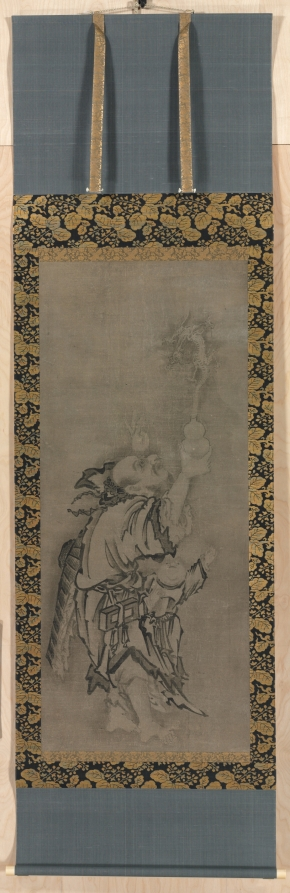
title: Hotei with Daoist Immortals: Immortal with Gourd and Dragon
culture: Japan, Edo period (1615–1868)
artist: Kyūseki Tomonobu (Japanese, 1653–1721)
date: late 1600s-early 1700s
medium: triptych of hanging scrolls: ink on paper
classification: Painting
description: Hotei was a Chan (Japanese: Zen) monk living in China during the 900s who, in the 1300s, became a legendary figure in Japan. At that time a popular cult praising him sprang up, extending beyond Zen to other religious communities. This rare triptych embraces a central Zen icon with flanking Daoist images, thereby suggesting the compatibility-rather than the exclusivity-of these two creeds. Hotei also enjoys popularity in Japan as a kind of genre, or folk figure, which explains his mirthful expression in Japanese paintings. The Daoist figures in contrast appear eccentric and foreign-looking, in keeping with Daoist lore. When these paintings came to the museum their appearance was compromised by poor quality textile mountings, and cracked paper surfaces deserving of restoration. The fact that these scrolls constituted an integral set that properly had to be shown as a unit heightened the need to stabilize their condition and improve their presentation for museum visitors. A complete remounting of each scroll occurred following the cleaning of the paper surfaces and the repair of the lifting surface areas. No inpainting was done, thereby preserving the original ink values and brushstrokes.